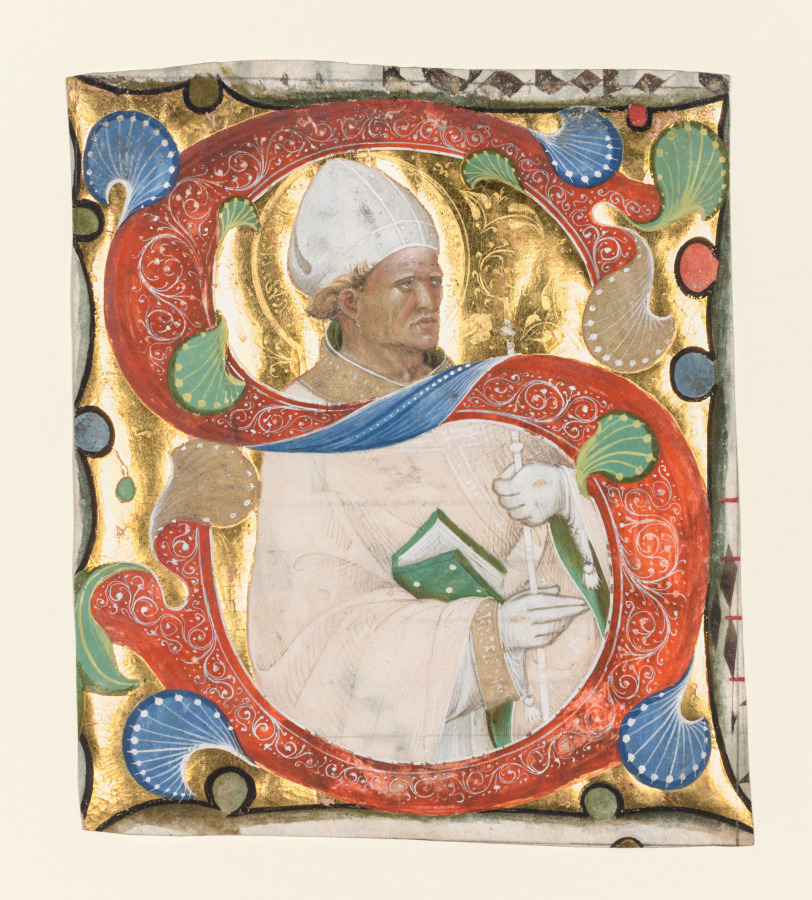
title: Initial S from a Gradual: Saint Augustine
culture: Italy, Venice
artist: Master of the Murano Gradual (Italian)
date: c. 1420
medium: ink, tempera, and gold on vellum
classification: Manuscript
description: This initial belongs to a large group of excised miniatures of saints once part of a gradual used in a Venetian Camaldolese monastery, probably San Michele on the island of Murano. The artist has shown a fondness here for unusual decorative features such as the band of pseudo-Arabic writing along the sleeve and the feathery-white scrolling leaves resembling shells.